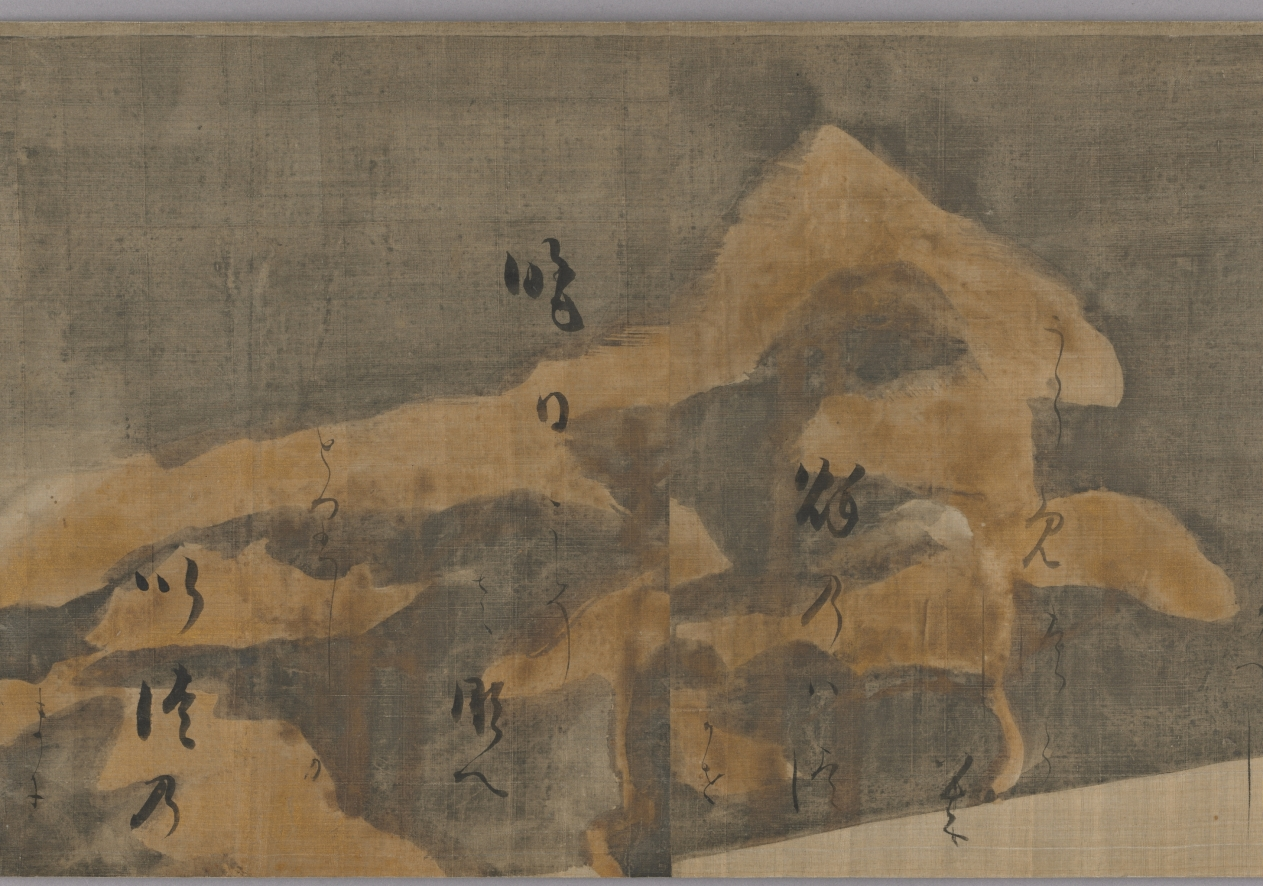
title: Selections from the Collection of Japanese Poems from Ancient and Modern Times (Kokin wakashū) with Design of Pines Along the Shore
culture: Japan, Momoyama period (1573-1615) to Edo period (1615-1858)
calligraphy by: Hon'ami Kōetsu (Japanese, 1558–1637)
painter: attributed to Tawaraya Sōtatsu (Japanese, c. 1570–c. 1640)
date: 1600s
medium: handscroll; ink on silk with gold and silver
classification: Calligraphy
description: The calligrapher and craftsman Hon’ami Kōetsu frequently collaborated with Tawaraya Sōtatsu, a painter who ran a studio that produced fans and screens. Sōtatsu’s work featured abstracted and flattened shapes, fields of color and gold, and asymmetry. In particular, motifs that appeared in small scale, such as flora and fauna, in early decorated Japanese papers were painted in a larger scale—blown up as if seen under a magnifying glass. For this handscroll, Kōetsu brushed poems from the autumn section of a poetry anthology onto silk with a landscape of pines in gold and silver likely painted by Sōtatsu.